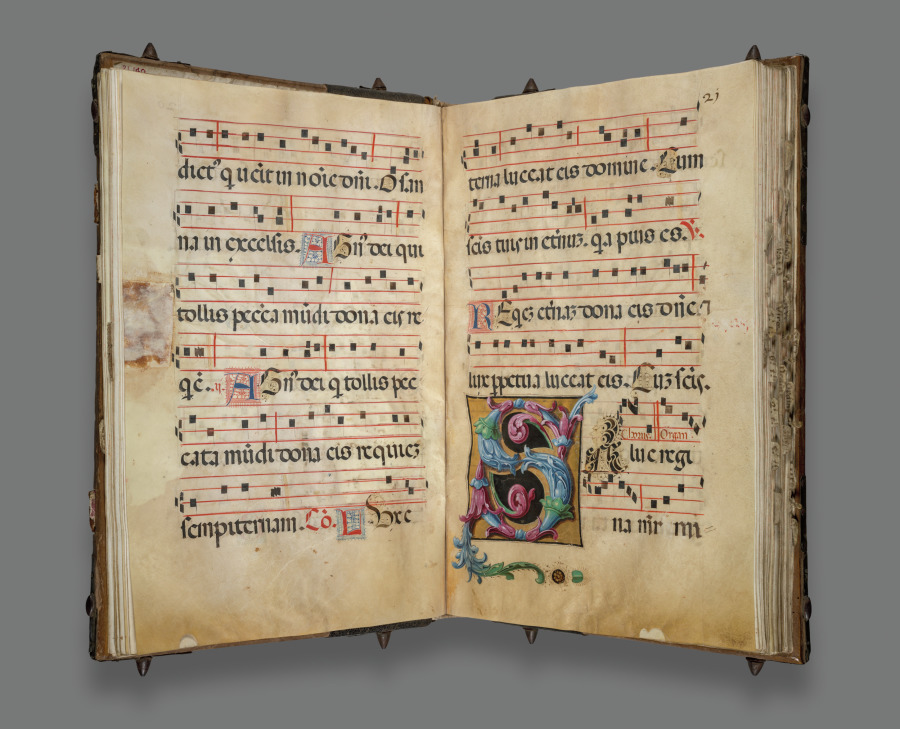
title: Gradual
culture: Italy, Verona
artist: circle of Girolamo dai Libri (Italian, 1474–1555)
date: c. 1520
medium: ink, tempera, and gold on parchment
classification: Manuscript